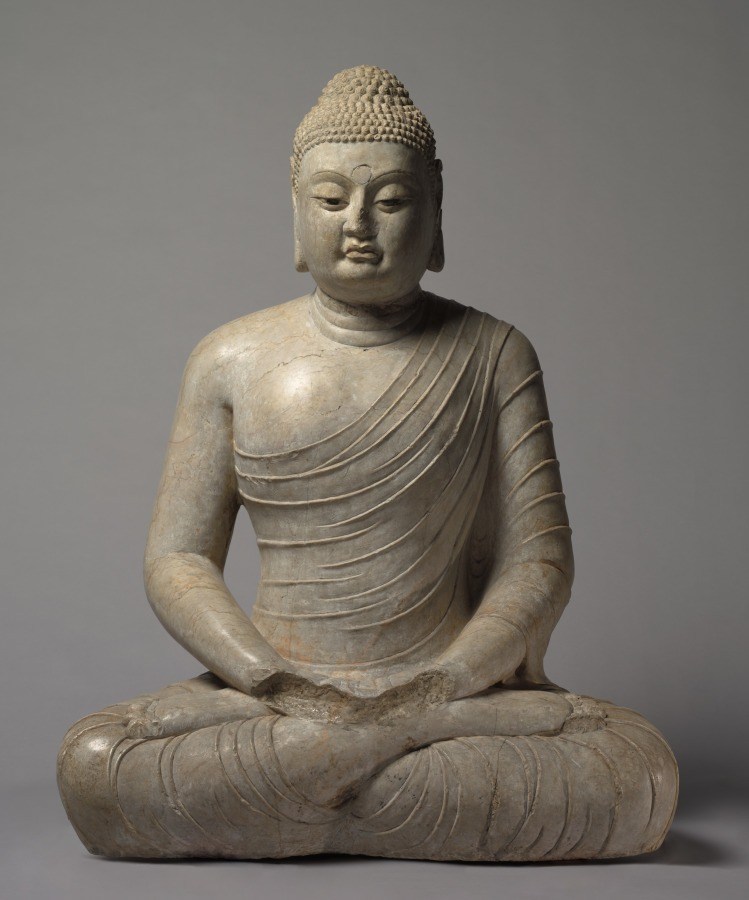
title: Seated Amitayus Buddha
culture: China, Northern Qi dynasty (550-577)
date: c. 570s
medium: marble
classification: Sculpture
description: Amitayus, the Buddha of Infinite Life, is seated in meditation on a double lotus pedestal. The pedestal was not made with the statue but the combination is faithful to the original artistic conception. The statue is an extremely rare example of a major type of Northern Qi Buddhist sculpture. The heavy, massive front highlights the sense of monumentality and the spiritual essence of the Buddha. Today the sculpture is united with a pedestal that exhibits the rich, ornate style of early Tang sculpture. It was commissioned by the Duke of Liang, Fang Xuanling (578–648), for the blessing of his second son and daughter-in-law, the Tang imperial princess of Gaoyang. The iconography and inscription suggest that it originally went with a statue, now missing, of Shakyamuni, the historical Buddha, instead of Amitayus.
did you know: The stringlike folds of the Buddha's draperies emphasize his monumental, rigidly erect torso and tubular limbs.